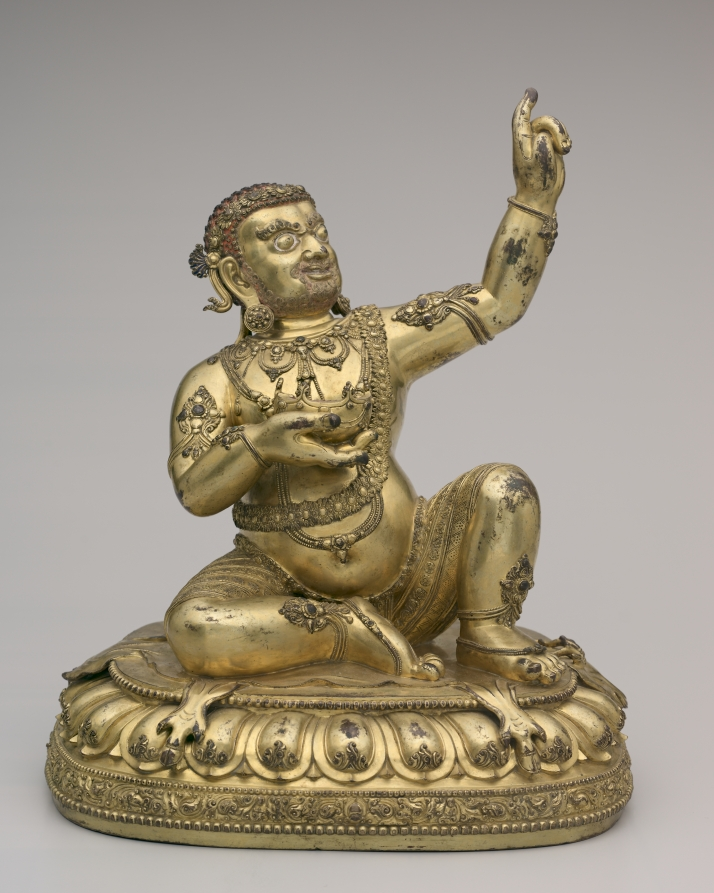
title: Virupa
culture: China, Ming dynasty (1368-1644), Yongle reign (1403-1424)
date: early 1400s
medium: Gilt bronze with silver, stones, and pigment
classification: Sculpture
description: Virupa is one of the great teachers in the history of tantric Buddhism. His posture references his ability to stop the sun; as an enlightened being, he can control phenomena of nature. As a tantric practitioner, he overturns ordinary assumptions about proper behavior, so he overeats, drinks large quantities of liquor, and waits for the king to pay his bill at the tavern. At the edge of the lotus pedestal is an inscription identifying the image as having been made in the imperial kilns of the third emperor of the Ming dynasty in China as a gift to a Tibetan monastic leader. While closely linked to Tibetan styles, the luxurious detailing, special gilding process, and the casting of the ornaments onto the body without use of inlay are specifically Chinese characteristics.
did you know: Virupa's clothing and jewelry are embellished with silver and stones, while pigments enhance his hair and eyes.